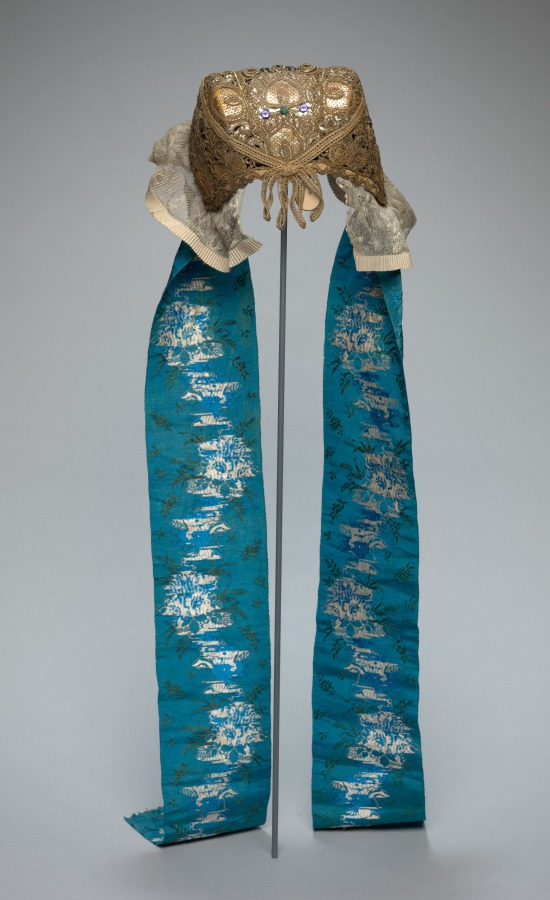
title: Headdress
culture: Germany, Buckeburg, 18th century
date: 1700s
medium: embroidery, gold thread; decorated with gold lace and streamers of moiré ribbon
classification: Garment